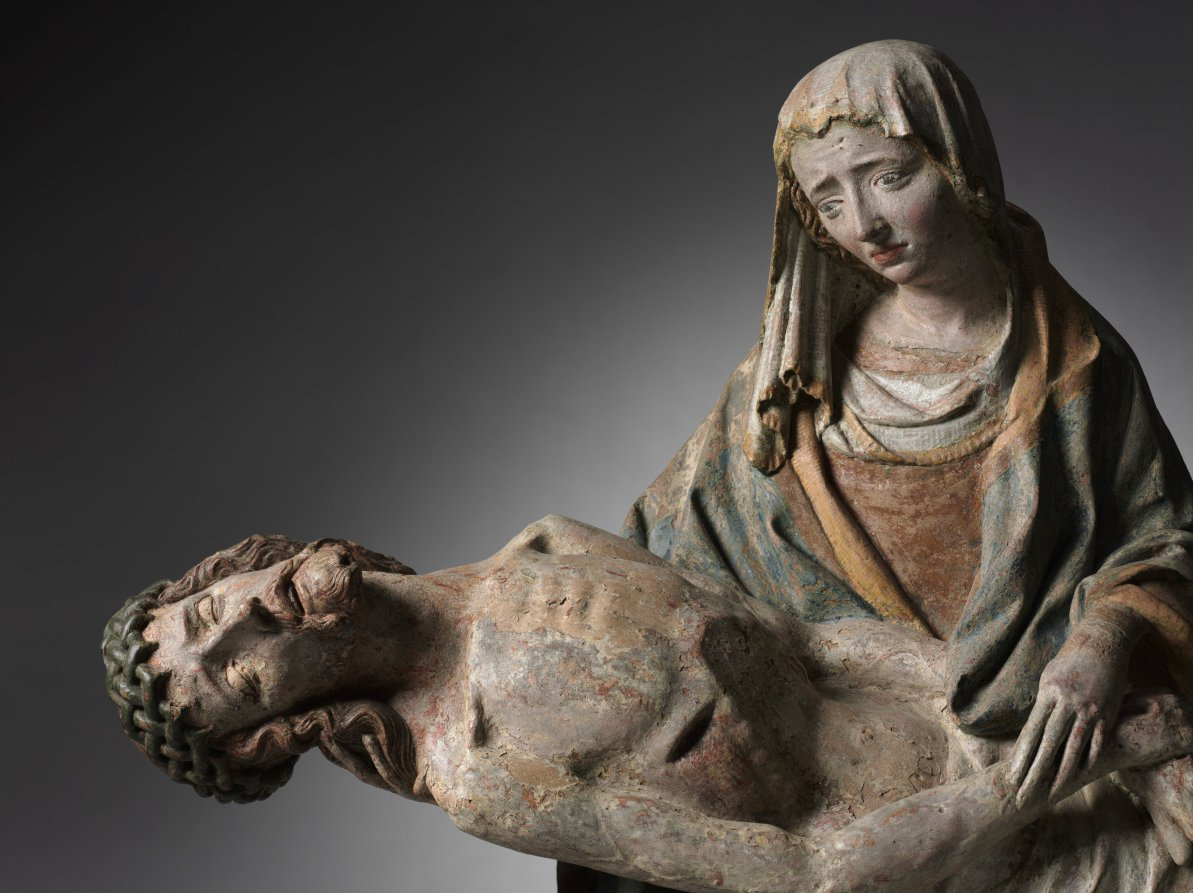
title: Vesperbild (Pietà)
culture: Austria, Steiermark, 15th century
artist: Master of Grosslobming (Austrian)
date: c. 1420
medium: painted cast stone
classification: Sculpture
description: The word vesperbild is the German word for pietà, the image of the Virgin Mary cradling her dead son on her lap. The theme has no literary source; it originated in Germany during the early 1300s and was more widespread in central Europe than in Italy. These devotional sculptures were used within the interior of a church, in small side chapels dedicated to the Virgin. As in this example, they often convey her grief in a sensitive way. For those who prayed before them, vesperbilds were poignant reminders of the Passion of Christ and the suffering of the Virgin.